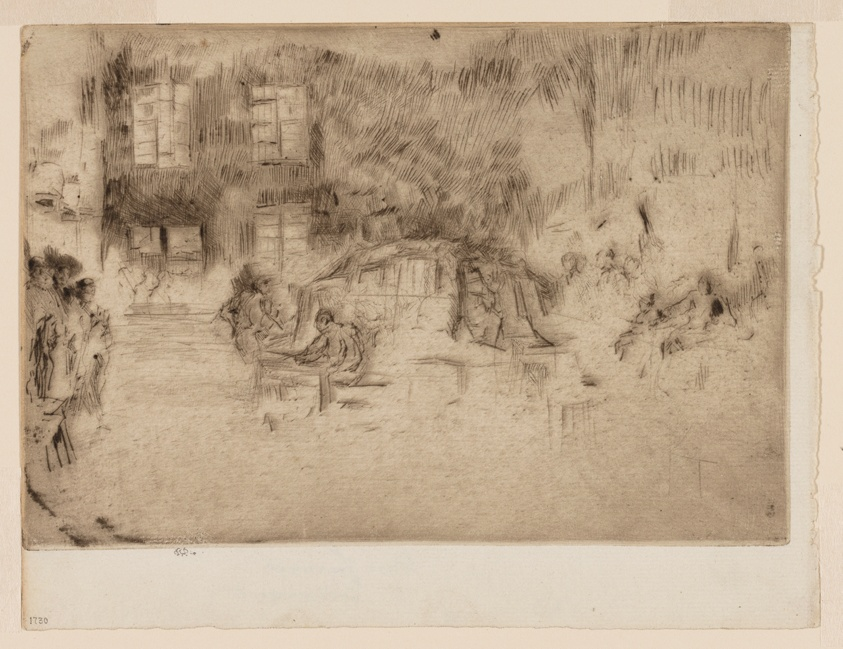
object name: Print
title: Murano - Glass Furnace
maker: James McNeill Whistler (American, 1834-1903)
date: 1879/80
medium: Drypoint in black ink on off-white laid paper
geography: United States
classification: drypoint; print; prints and drawing; paper